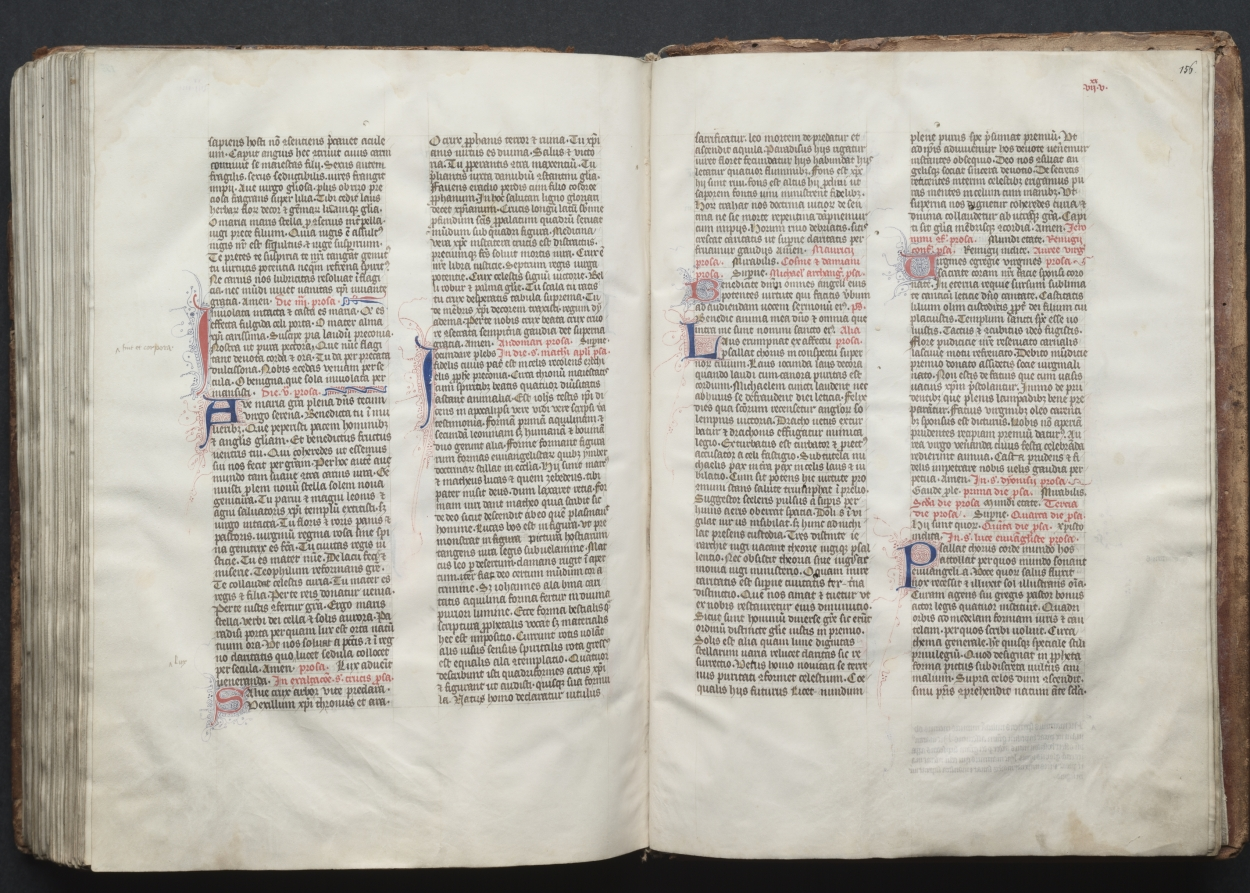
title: The Gotha Missal: Fol. 155v, Text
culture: France, Paris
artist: Master of the Boqueteaux (French)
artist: and Workshop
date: c. 1375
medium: ink, tempera, and gold on vellum; blind-tooled leather binding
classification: Bound Volume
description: The style and quality of this manuscript's decoration is typical of deluxe Parisian books made for aristocratic or royal patrons. Most of the book's decoration appears to be the work of the Master of the Boqueteaux, an artist active at the court of King Charles V (died 1380). His style was apparently shared by a number of book illuminators working in and around Paris. It is very possible that the Gotha Missal belonged to Charles V, but is not provable because the manuscript has no royal portraits and lacks a colophon. Given the book's magnificent decoration, however, it would seem that it was produced for a Valois prince, if not for the king himself. The manuscript receives its name from the German dukes of Gotha, its later owners.